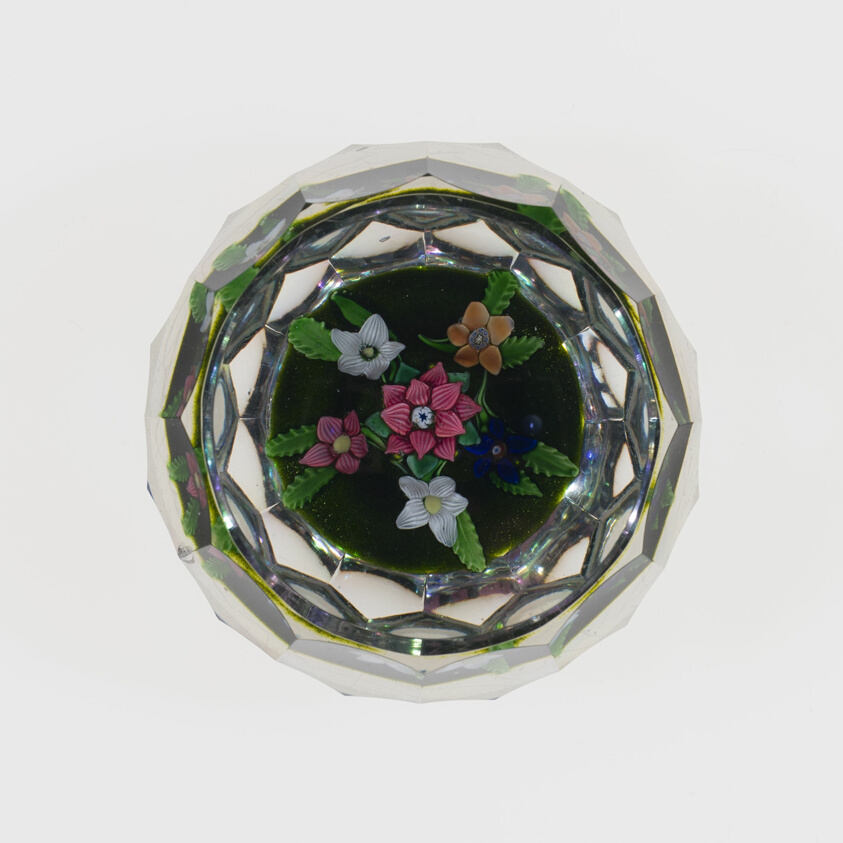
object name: Glass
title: Paperweight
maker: Saint-Louis Glassworks (Cristalleries de Saint-Louis); Lorraine, France, founded 1586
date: c. 1848–55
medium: Glass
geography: Saint-Louis-lès-Bitche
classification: paperweight; lampwork; european decorative arts; glass